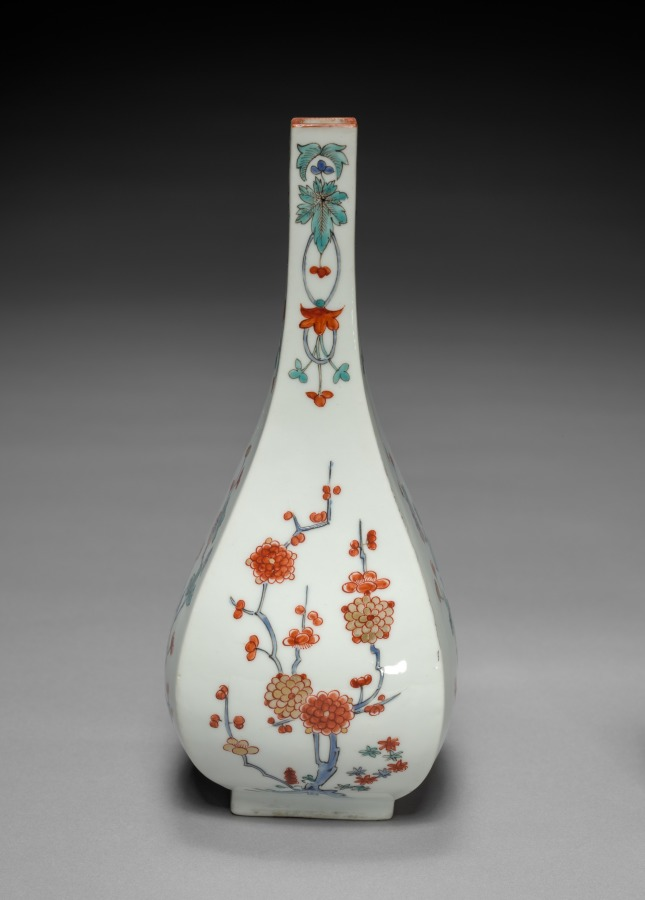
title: Bottle Vase with Plum and Chrysanthemum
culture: Japan, Edo period (1615–1868)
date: late 1600s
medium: porcelain with overglaze color enamel and gold (Hizen ware, Kakiemon type)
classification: Ceramic